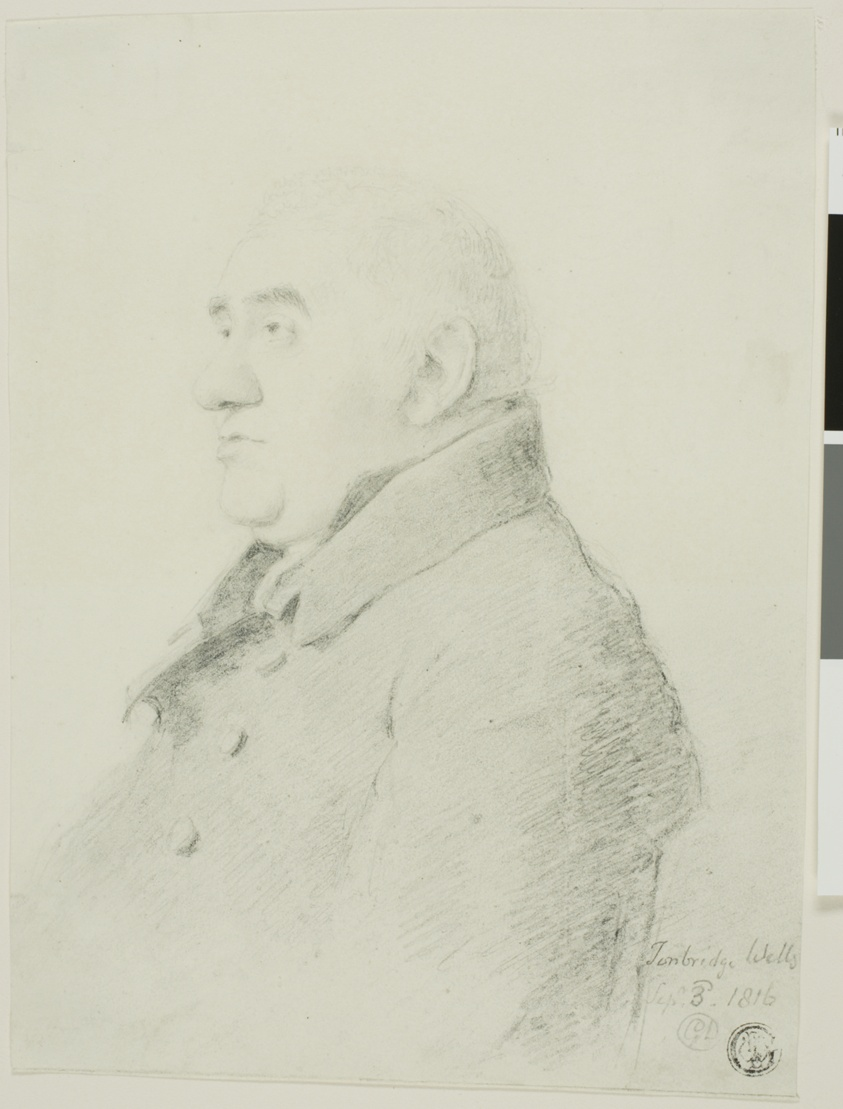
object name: Drawing and Watercolor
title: Portrait of a Gentleman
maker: George Dance, II (English, 1741-1825)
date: 1816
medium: Graphite, with traces of red, on ivory wove paper, tipped onto blue and cream wove papers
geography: England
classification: graphite; drawings (visual works); prints and drawing